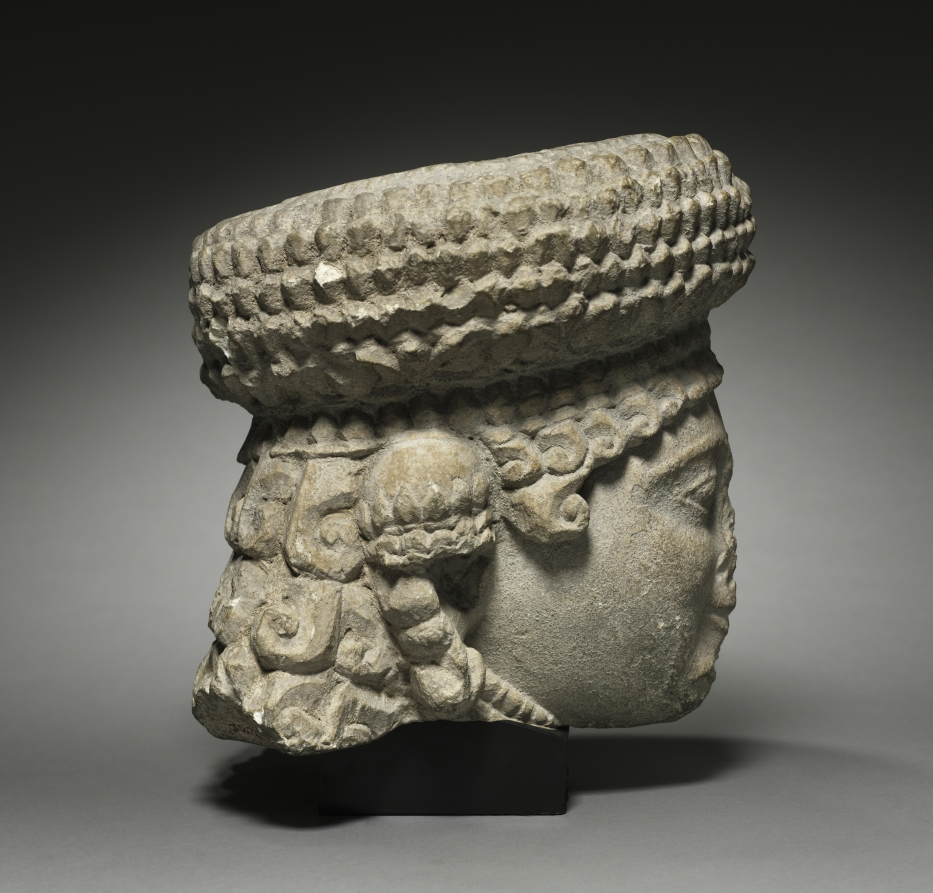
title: Head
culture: Cyprus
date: 500–300 BCE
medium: limestone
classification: Sculpture